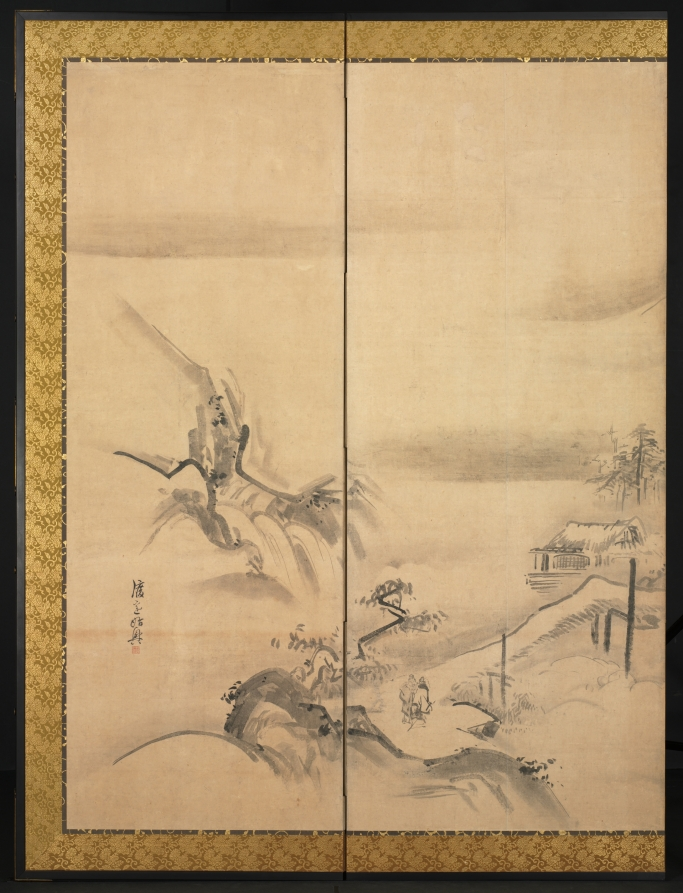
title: Eight Views of the Xiao and Xiang Rivers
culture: Japan, Edo period (1615–1868)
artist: Watanabe Shikō (Japanese, 1683–1755)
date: 1700s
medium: Six-panel folding screen; ink on paper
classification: Painting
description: Watanabe Shiko enjoyed a versatile and successful career, as well as a privileged upbringing, in Kyoto. His surviving work indicates a capacity to diligently study, master, and then interpret several painting techniques—each of which varies considerably in appearance. These byobu (folding screens), for instance, reflect training in the Kano school idiom that favored a monochromatic ink palette, vigorous brushwork, and traditional Chinese—rather than Japanese—subject matter. Shiko rendered this scenery in a particularly expansive manner, suggesting the vastness of China's topography relative to Japan's. Frequent visitors to the museum will recall that Shiko also painted the collection's favored pair of byobu, the Irises (CMA 1954.603).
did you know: This screen forms a pair with CMA 1968.267.